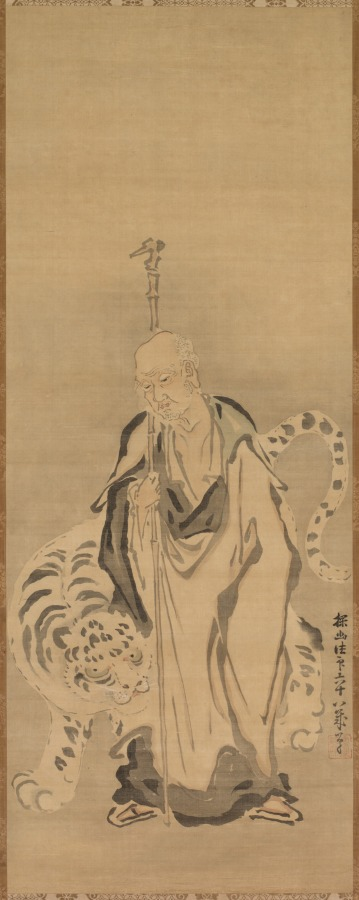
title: A Sage with Tiger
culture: Japan, Edo period (1615–1868)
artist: Kano Tan’yū (Japanese, 1602–1674)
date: 1661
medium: One of a triptych of hanging scrolls; ink and slight color on silk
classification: Painting